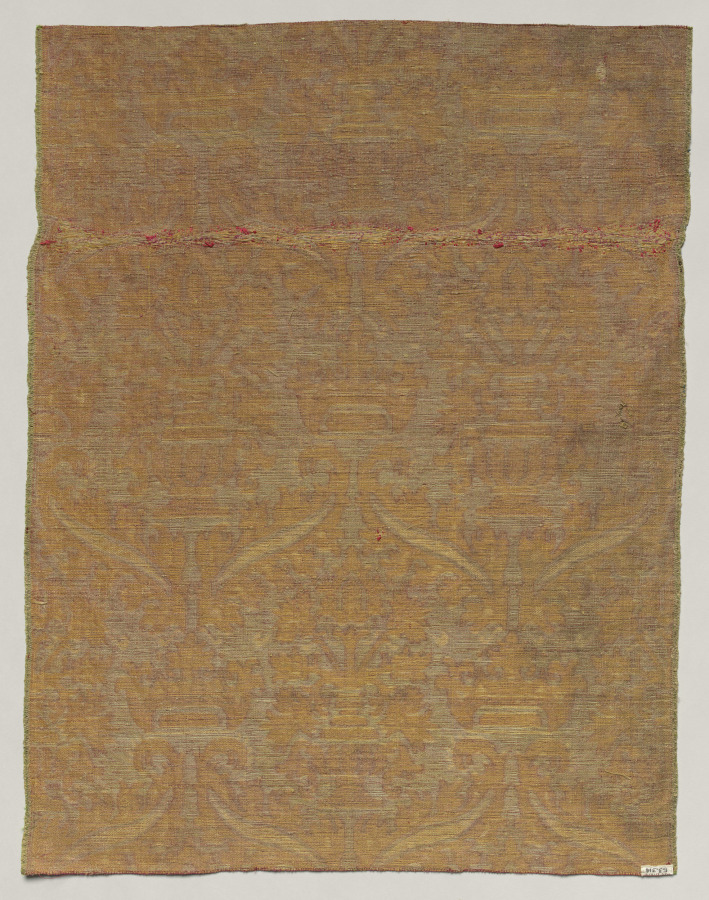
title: Silk and Hemp Fragment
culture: Spain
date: 1500s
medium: plain compound cloth (so-called brocatelle): silk and linen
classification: Textile